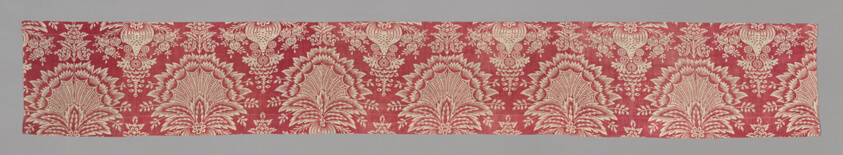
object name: Textile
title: Panel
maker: France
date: c. 1830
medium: Cotton, plain weave; block printed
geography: France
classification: textile; weaving - printed; printed textile